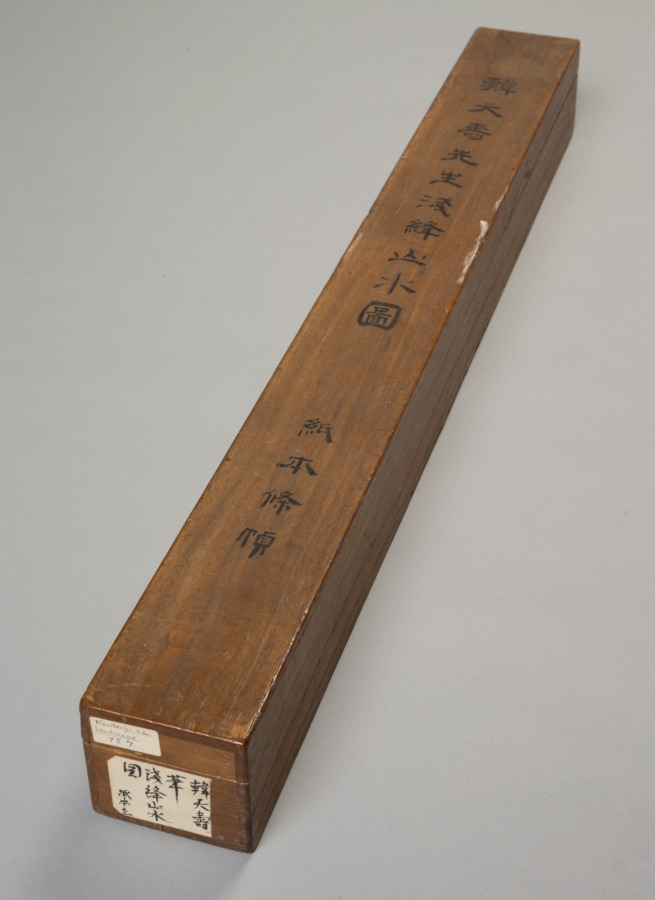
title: Landscape with Gentle Peaks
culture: Japan, Edo period (1615–1868)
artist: Kan Tenju (Japanese, 1727–1795)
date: 1767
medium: hanging scroll; ink and light color on paper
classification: Painting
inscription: 雨過嵐光煙／雲陽樹影諫／夕陽独在左／？卷讀残書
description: A figure sits in a retreat tucked into the mountains near a waterfall. The painter, Kan Tenju, was best known as a calligrapher and seal carver. Of Korean heritage, he was a patron of artist Ike Taiga (池大雅) (1723–1776), and a cousin of Taiga’s student Aoki Shukuya (青木 夙夜) (died 1802). His Chinese-style poem reads as follows: Smoky mist in the mountain reflects light after the rain, Sunlight passes through the clouds to cast shadows of the trees, Alone in the sunset, I read a well-worn book.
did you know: This painting combines image and calligraphy, connected by skillful brushwork.